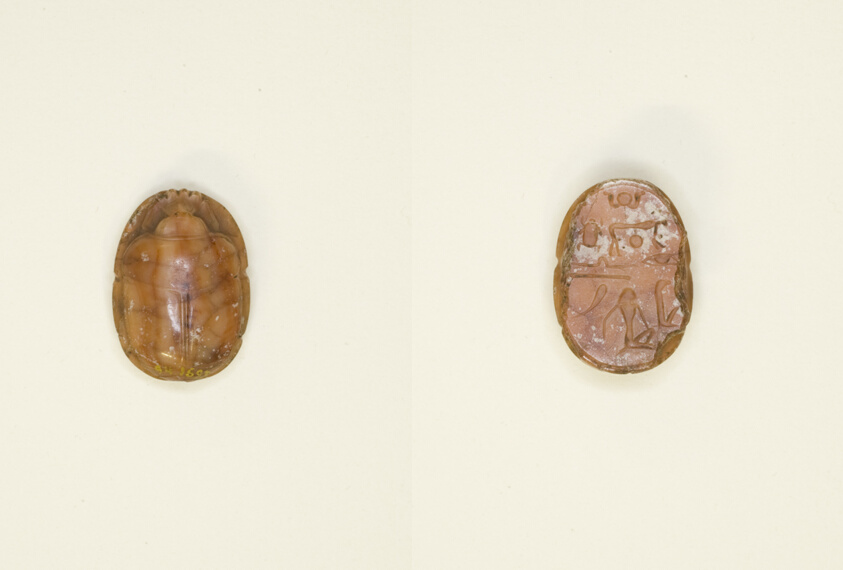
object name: Costume and Accessories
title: Scarab with Hieroglyphs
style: ptolemaic, greco-roman (egyptian)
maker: Egyptian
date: Third Intermediate Period–Late Period, Dynasties 21/30 (about 1069–343 BCE)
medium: Carnelian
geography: Egypt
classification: scarab; stone; ancient art; costume